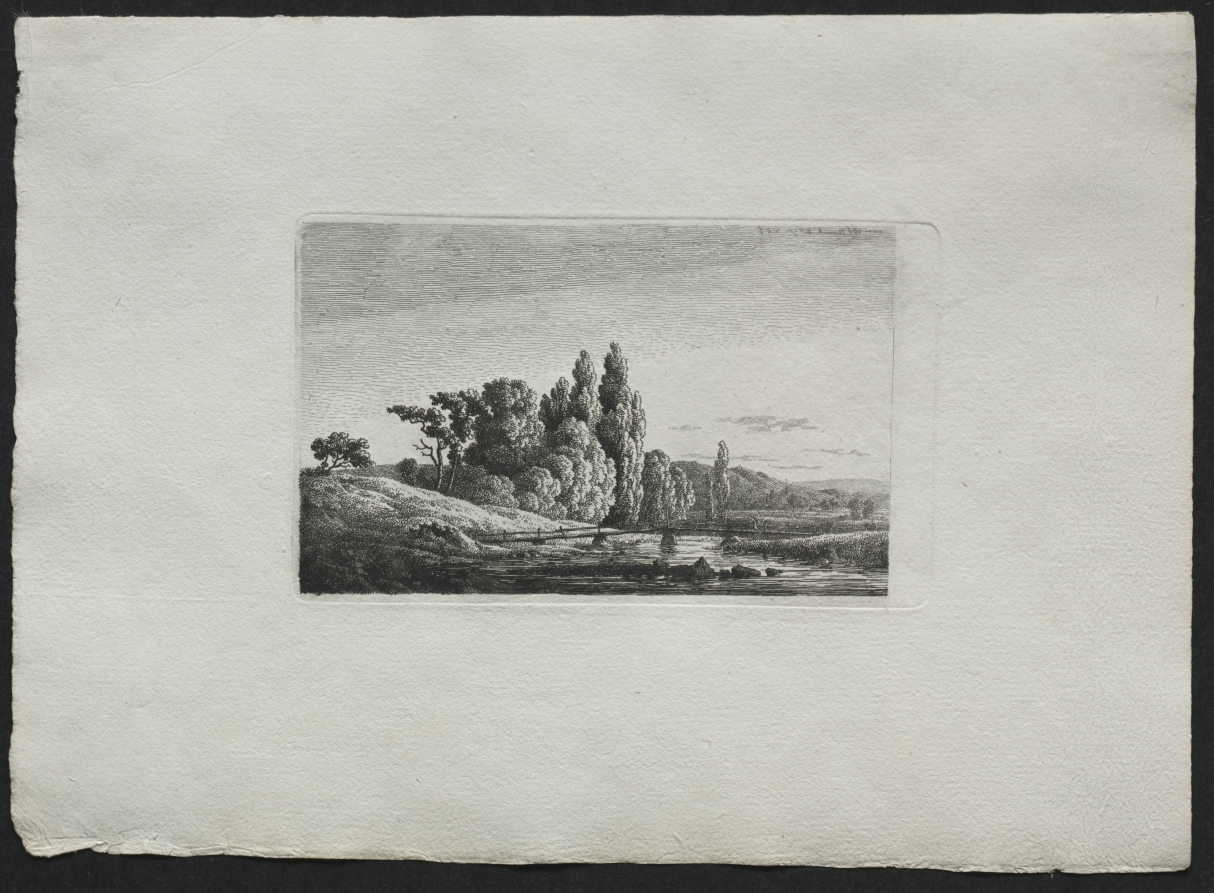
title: Footbridge with Cross before Trees at a River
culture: Germany, 19th century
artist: Caspar David Friedrich (German, 1774–1840)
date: c.1803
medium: etching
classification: Print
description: Landscape was Caspar David Friedrich’s preferred subject, and for him spending time outdoors was a religious and transcendent experience. Here, the artist presented the terrain of Northern Germany as expansive and emphasized the smallness of man next to God’s creation. The fine, dense etched lines used to depict the landscape are juxtaposed with the broad strokes that make up the sky and horizon. Friedrich experimented with printmaking for only five years, and this print is one of just a few existing impressions.